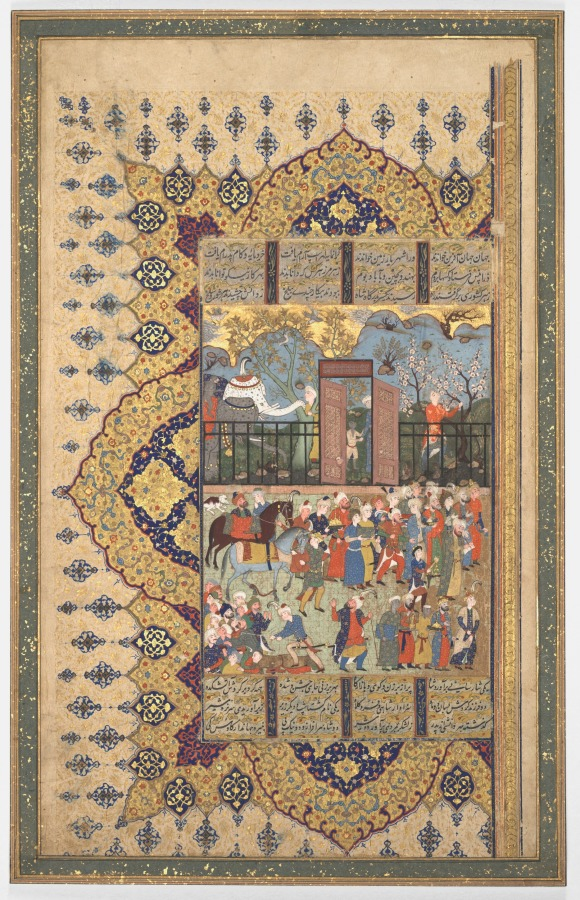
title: King Luhrasp Ascends the Throne: a Processon Arrives at Court (recto); the Story of King Luhrasp (verso) from a Shahnama (Book of Kings) of Firdausi (940-1019 or 1025)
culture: Iran, Shiraz, Safavid period (1501-1722)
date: c. 1560–90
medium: opaque watercolor, ink and gold on paper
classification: Manuscript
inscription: Script: Nasta'liq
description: This scene of a procession arriving at court was surely completed by the court scene itself. The subject of the frontispiece had nothing to do with the text that it accompanied, and the text has not been identified.